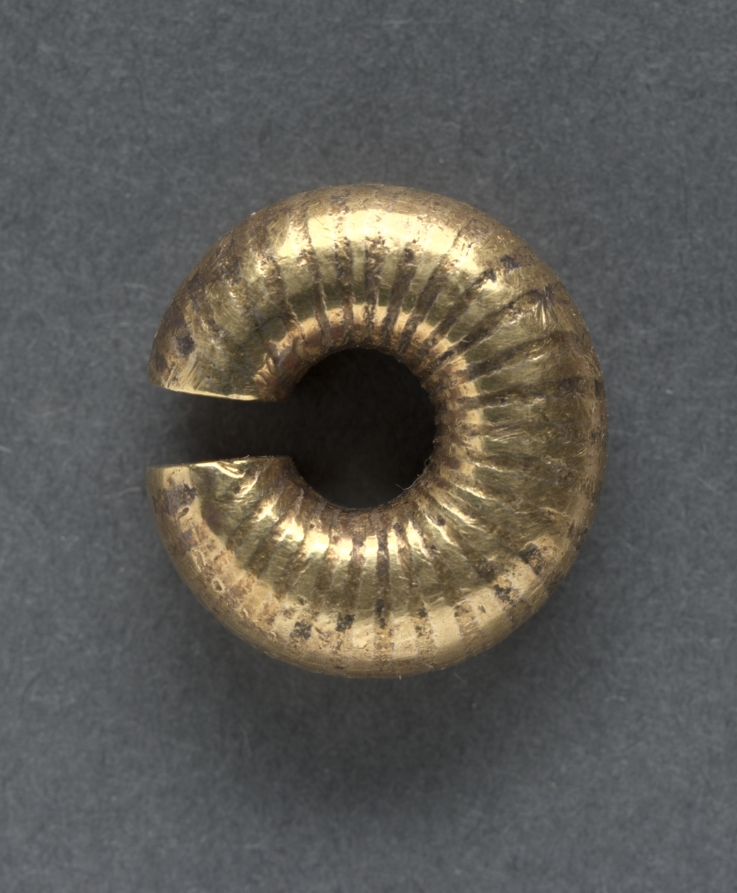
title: Ring Money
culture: England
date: c. 100–50 BCE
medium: gold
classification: Coins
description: Used in the ancient world from c. 1600 BC, gold ring money was also in general use in Ireland around 100-50 BC. It was used in Britain as well but not to the same extent. This piece was found at Norman Leighton, Warwickshire, almost the central county of England. As a means of exchange, gold was scarce in Britain until successive waves of invaders from the mainland, fleeing the expanding power of the Romans, brought with them degraded staters, an ancient gold coin of the Greeks.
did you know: Ring money could be strung, allowing you to wear your wealth and easily carry it with you.